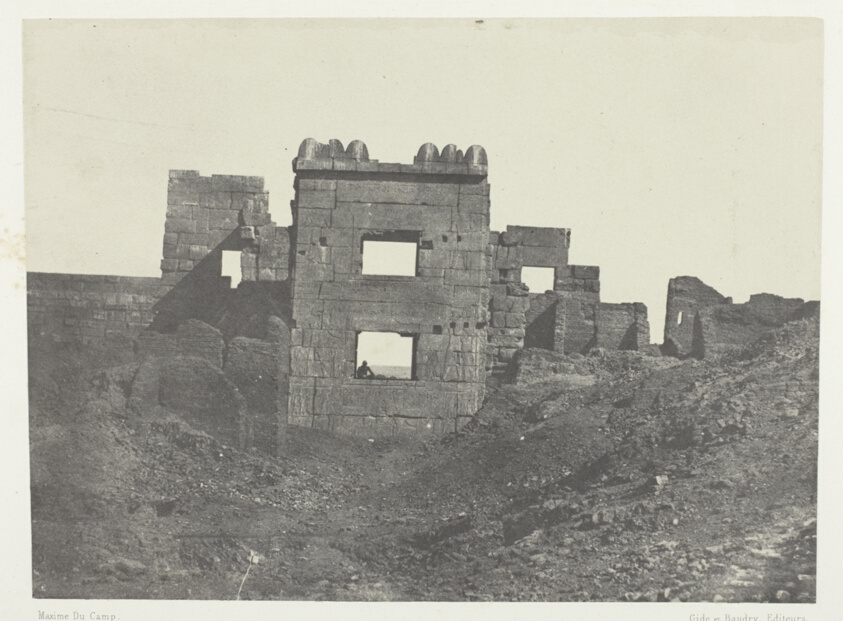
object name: Photograph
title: Médinet-Habou, Façade Orientale du Gynécée de Ramsès-Mèiamoun; Thèbes, plate 48 from the album "Egypte, Nubie, Palestine et Syrie" (1852)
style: 19th century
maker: Maxime Du Camp (French, 1822–1894)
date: 1849/51, printed 1852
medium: Salted paper print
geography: France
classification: salted paper print; photographic process; photography; photograph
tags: Collected by Hugh Edwards, Egypte, Nubie, Palestine et Syrie